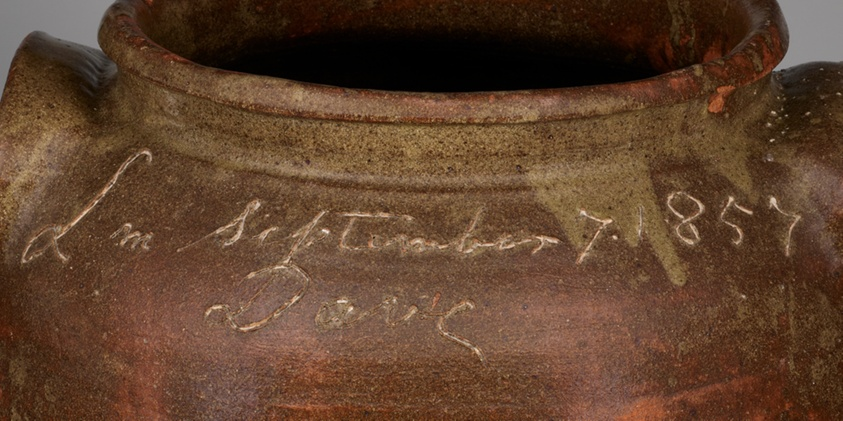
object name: Ceramics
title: Storage Jar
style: 19th century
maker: David Drake (American, c. 1801–1870s); Lewis Miles Stoney Bluff Manufactory [plantation] (American, c. 1840–70s); Edgefield, South Carolina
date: 1857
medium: Stoneware and glaze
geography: Edgefield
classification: container; american decorative arts; pottery; ceramics; stoneware; vessel; decorative arts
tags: storage